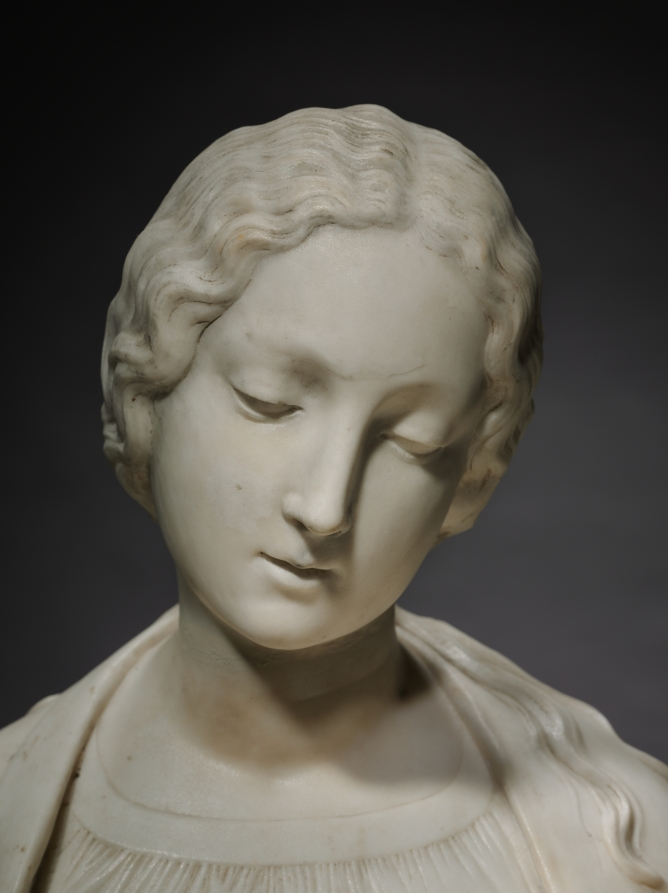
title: Saint Margaret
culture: Italy, Sicily, Palermo, 16th century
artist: Antonello Gaggini (Italian, 1478–1536)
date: c. 1520–1530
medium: marble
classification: Sculpture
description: Gaggini was a member of a large family of sculptors whose Palermo workshop supplied monumental religious sculptures for the cathedrals of Palermo and Messina in Sicily and Montelione in Calabria. After 1507 Antonello himself worked for 15 years to produce marble sculptures for Palermo Cathedral. This figure of the legendary virgin martyr, Saint Margaret, was probably commissioned for one of these ecclesiastical foundations, possibly the chancel of Palermo Cathedral. The saint is shown reading from a book of hours (a sign of her piety) and trampling upon a dragon, the symbol of Satan. The dragon became the attribute by which she is recognized in sacred art.